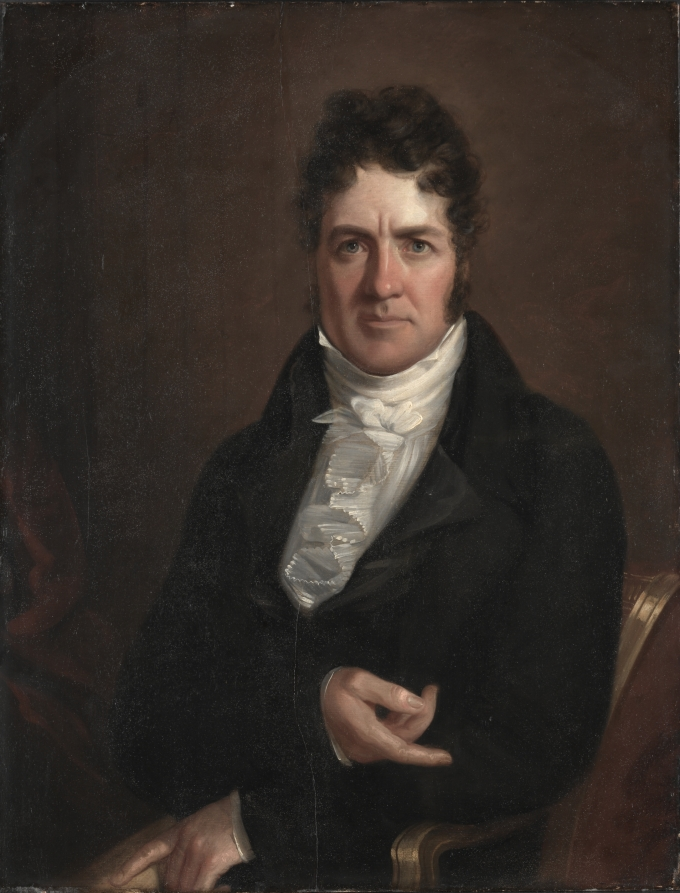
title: Thomas Abthorpe Cooper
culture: America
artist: John Wesley Jarvis (American, born England, 1781–1840)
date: c. 1810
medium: oil on wood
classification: Painting